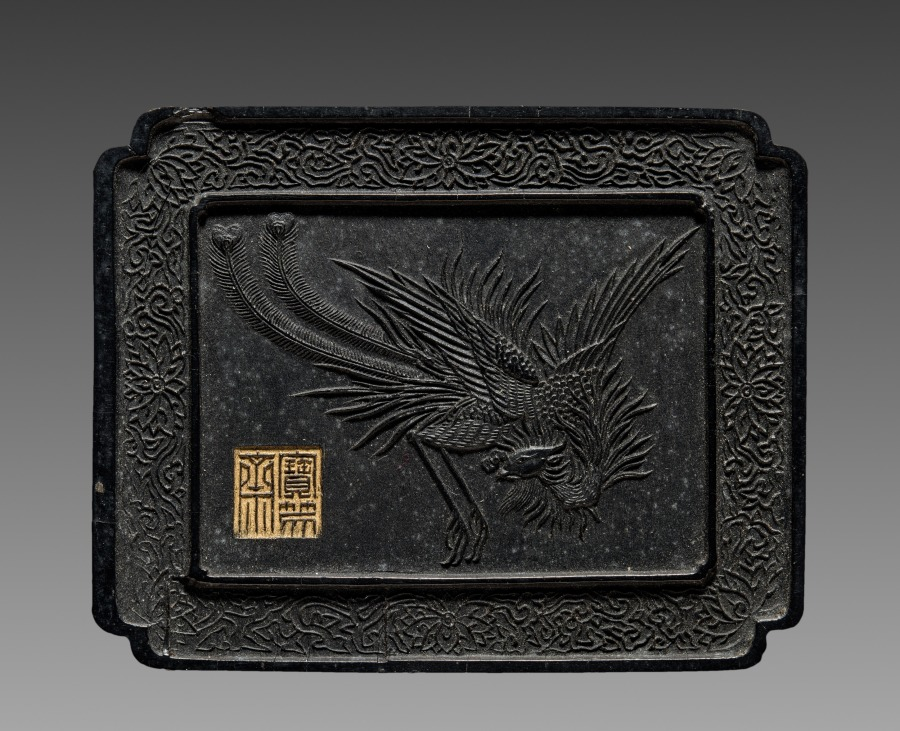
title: Ink Cake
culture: China, Qing dynasty (1644-1911)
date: 19th Century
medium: ink cake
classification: Miscellaneous